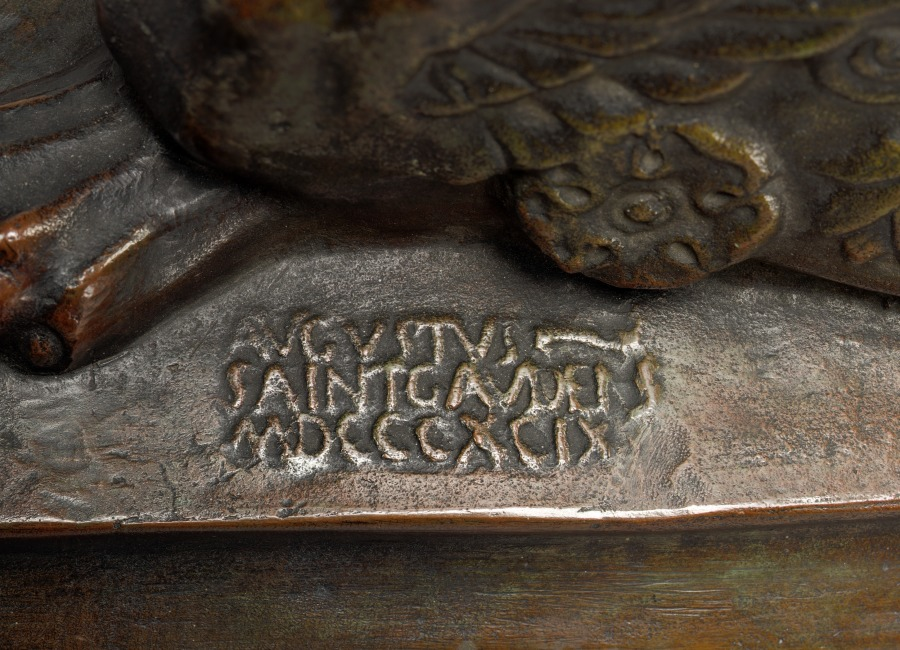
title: Diana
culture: America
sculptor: Augustus Saint-Gaudens (American, born Ireland, 1848–1907)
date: modeled 1899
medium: bronze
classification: Sculpture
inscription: Signed and dated on base: AUGUSTUS SAINT GAUDENS, MDCCCXCIX; inscribed on triangular base: DIANA OF THE TOWER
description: Depicting the Roman goddess of the hunt, Diana is a small version of the massive weathervane Augustus Saint-Gaudens designed for the second iteration of Madison Square Garden in New York, a building that was demolished in 1925. Although controversial for its nudity, the weathervane dominated the city's skyline and became a prominent landmark. Due to its popularity, Saint-Gaudens marketed tabletop versions of the sculpture, which were sold through high-end retailers such as Tiffany and Co.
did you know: The face of Diana was inspired by Davida Johnson Clark, the artist's longtime model, muse, and lover.